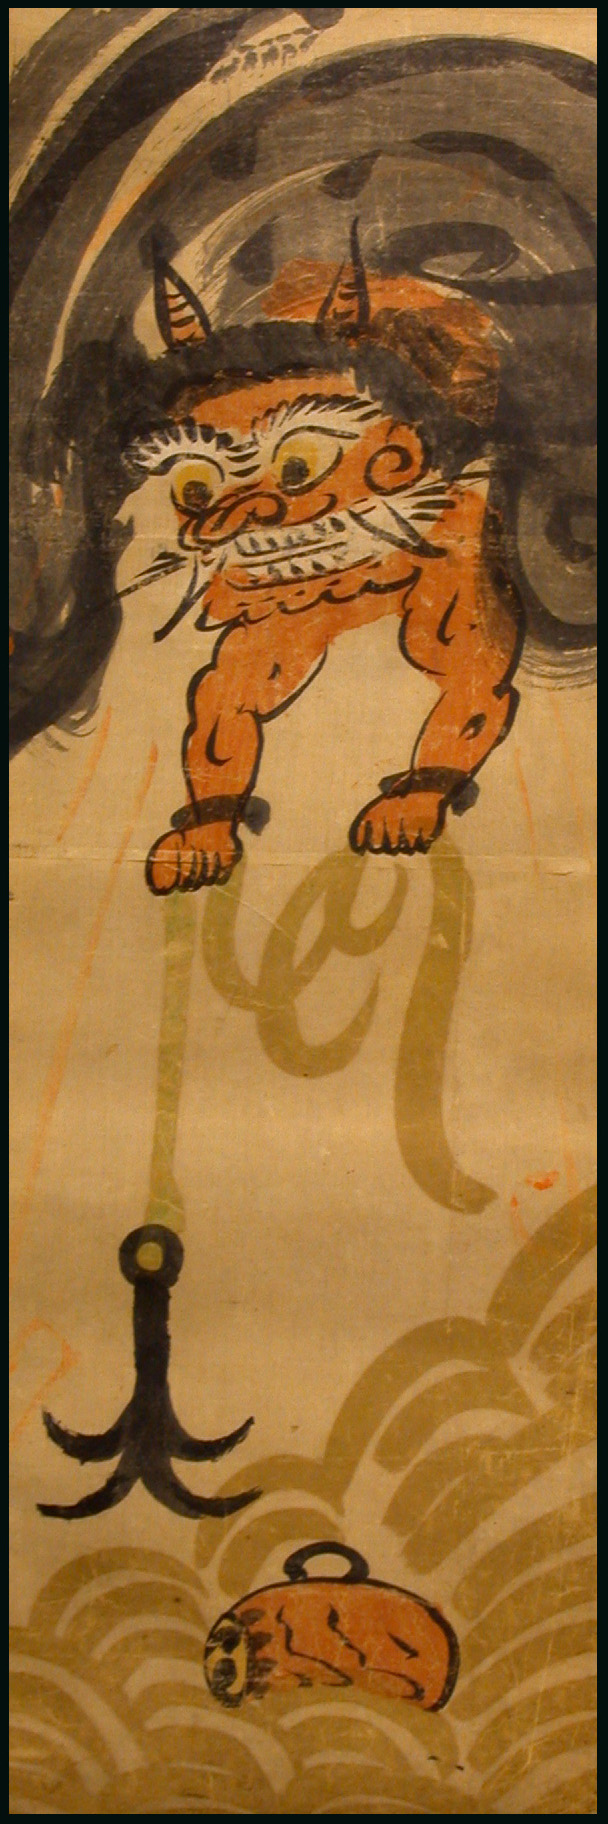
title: The God of Thunder and his Drum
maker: Artist Unknown; Japanese, 18th century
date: 18th century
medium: Hanging scroll; ink and colors on paper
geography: Japan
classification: hanging scroll; painting; asian art